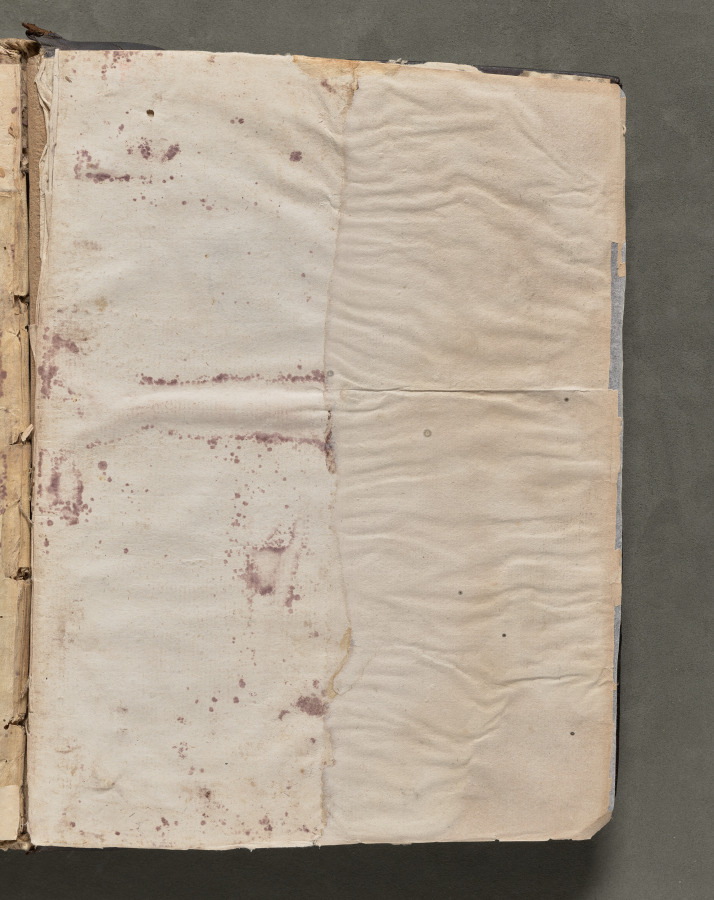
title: Text, folio 428 (recto), from a Gospel Book with Commentaries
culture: Byzantium, Constantinople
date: c. 1000–1100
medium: ink, tempera, and gold on vellum; leather binding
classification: Bound Volume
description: Each of the four gospels in this book opens on a page with brilliantly illuminated borders depicting the author of the text as well as birds—principally peacocks, symbols of the immortality of the soul—and fountains, representing the fountain of life and the salvation of the soul. This volume consists of 428 leaves with texts in Greek. Its level of sophistication suggests that it was probably written and decorated in a monastery in Constantinople.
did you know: Gospel books were carried in procession through Byzantine churches.